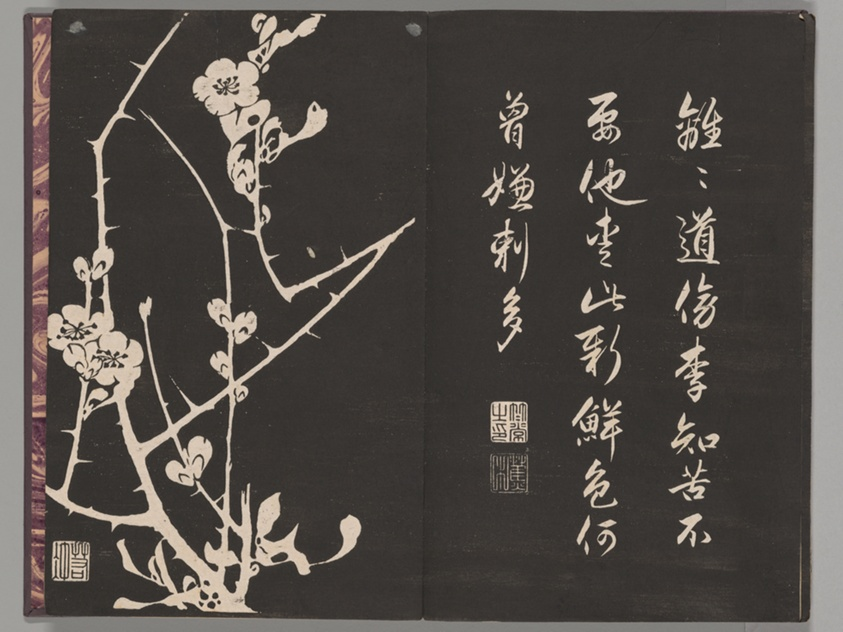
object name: Book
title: Soken sekisatsu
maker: Ito Jakuchu (Japanese, 1716-1800)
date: 1767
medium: Woodblock printed book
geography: Japan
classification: book